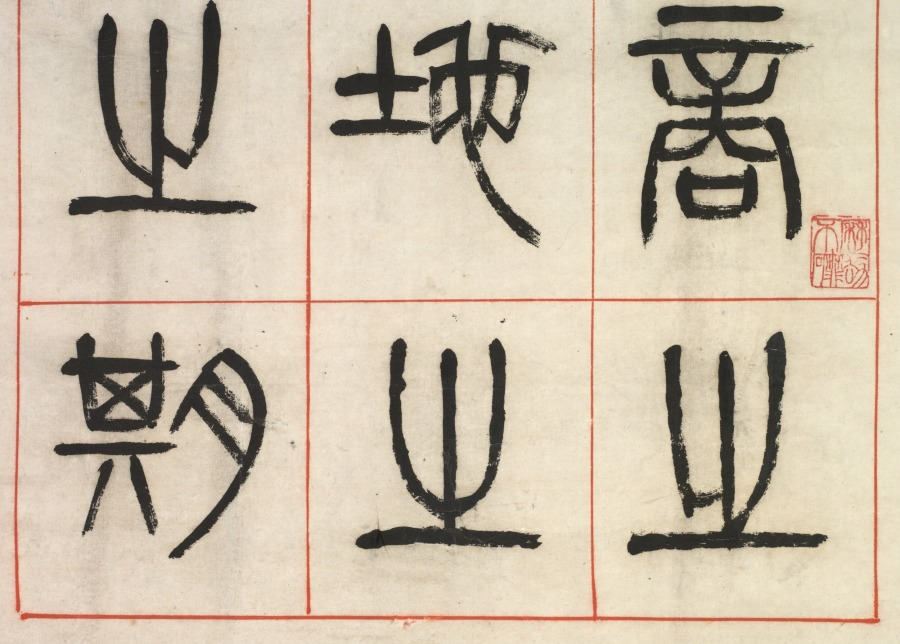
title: On Happiness, Calligraphy in Seal Script Style (zhuanshu)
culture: China, Changsu, Qing dynasty (1644-1911)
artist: Yang Yisun (Chinese, 1813–1881)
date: 1871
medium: hanging scroll, ink on paper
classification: Painting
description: Yang Yisun transcribed this ancient text on six narrow scrolls, starting at the top right and ending at the bottom left. Yang emphasizes the text’s historic nature by using the seal script style found on stone steles and bronze vessels. On Happiness features reflections of a scholar on a leisurely life in the countryside, composed by Han dynasty official Zhongchang Tong, who died the year the Han dynasty collapsed (AD 220). The idyllic life described in the text may bean evocation of the past in a time of national crisis. A decade before Yang wrote these scrolls, Anglo-French forces had looted and burned the Summer Palace in Beijing. At the same time, the domestic Taiping rebellion (1850–64), led by a religious fanatic to overthrow the Qing government, had devastated Yang’s homeland, the Jiangnan region, with an estimated 20 million lives lost.